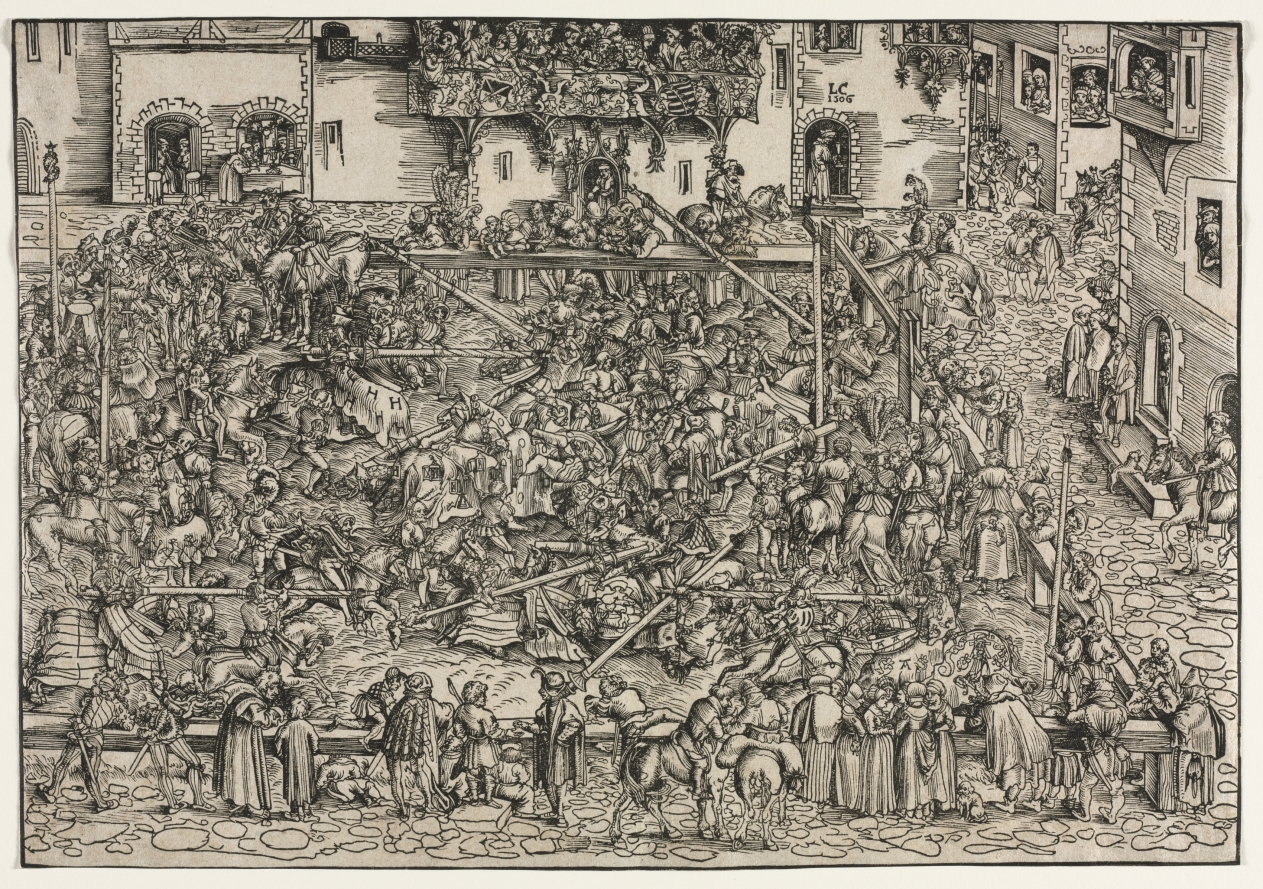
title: A Tournament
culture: Germany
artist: Lucas Cranach (German, 1472–1553)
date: 1506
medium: woodcut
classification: Print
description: Tournaments in the age of Holy Roman Emperor Maximilian were not the serious affairs of the Middle Ages, nor did they reflect actual methods of warfare, which relied on heavy cannons and mercenaries. Instead, they provided amusing entertainment for the aristocracy. This complex design, containing numerous combatants jousting with lances, was based on events that took place in the Wittenberg marketplace. Given Cranach's position as painter to the Saxon court, his workshop would probably have been responsible for the various painted decorations associated with such tournaments.